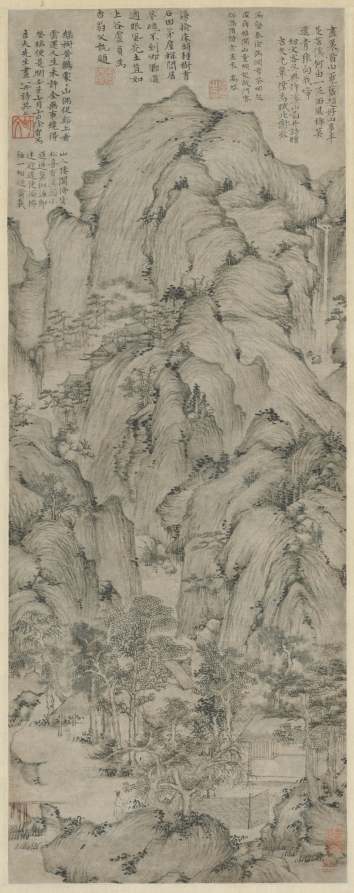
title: Streams and Mountains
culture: China, Yuan dynasty (1271-1368)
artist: Xu Ben (Chinese, 1335–1380)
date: 1372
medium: hanging scroll, ink on paper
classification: Painting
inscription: 綠樹黃鸝處處山， 偶從谿上看雲還。/ 人生未許全無事， 纔得登臨便是閑。 壬子七月十日徐賁為吉夫先生畫 並詩共上 [印] 幼文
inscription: Label on mounting probably by Liang Qingbiao 梁清標 (1620–1691).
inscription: 4 additional inscriptions and 9 additional seals: 1 poem of Xie Hui 謝徽 (c. 2nd half 14th c.); 1 poem and 1 seal of Gao Qi 高啟 (1336–1374); 1 poem and 1 seal of Lu Zhen 盧貞 (c. late 14th c.); 1 poem of Huang Zai 黃載; 3 seals of Liang Qingbiao 梁清標 (1620–1691); 1 seal of Wang Jiqian [C. C. Wang] 王季遷 (1907–2003); 3 seals unidentified.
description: Like many literati of the late Yuan and early Ming dynasties, Xu Ben was entangled with the perils of dynastic change as well as the ups and downs of his official career. It was mainly through the art of painting and poetry, as well as the ideal of reclusion, that he sought feelings of exhilaration and shared them with his friends. Xu created this monumental landscape during one of his periods of reclusion. His innumerable “hemp-fiber” texture strokes create a unifying rhythm among the towering mountains with tightly knit masses of rocks. Nestled among shady trees at the base of the mountain is a rustic retreat, which a scholar approaches on foot to visit with the hermit. Among the five inscriptions at the top of the painting is one by the artist himself. He dedicated the painting to someone named Jifu 吉夫 and recorded a poem in praise of mountains. Green trees, yellow orioles, everywhere are mountains; Aimlessly I return from the stream, where I watched the clouds. Man's life does not allow unbroken ease, But to be able to be high up in the mountain, this is leisure.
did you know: An attendant opens a reed gate to welcome the scholar with a walking stick approaching the rustic retreat.